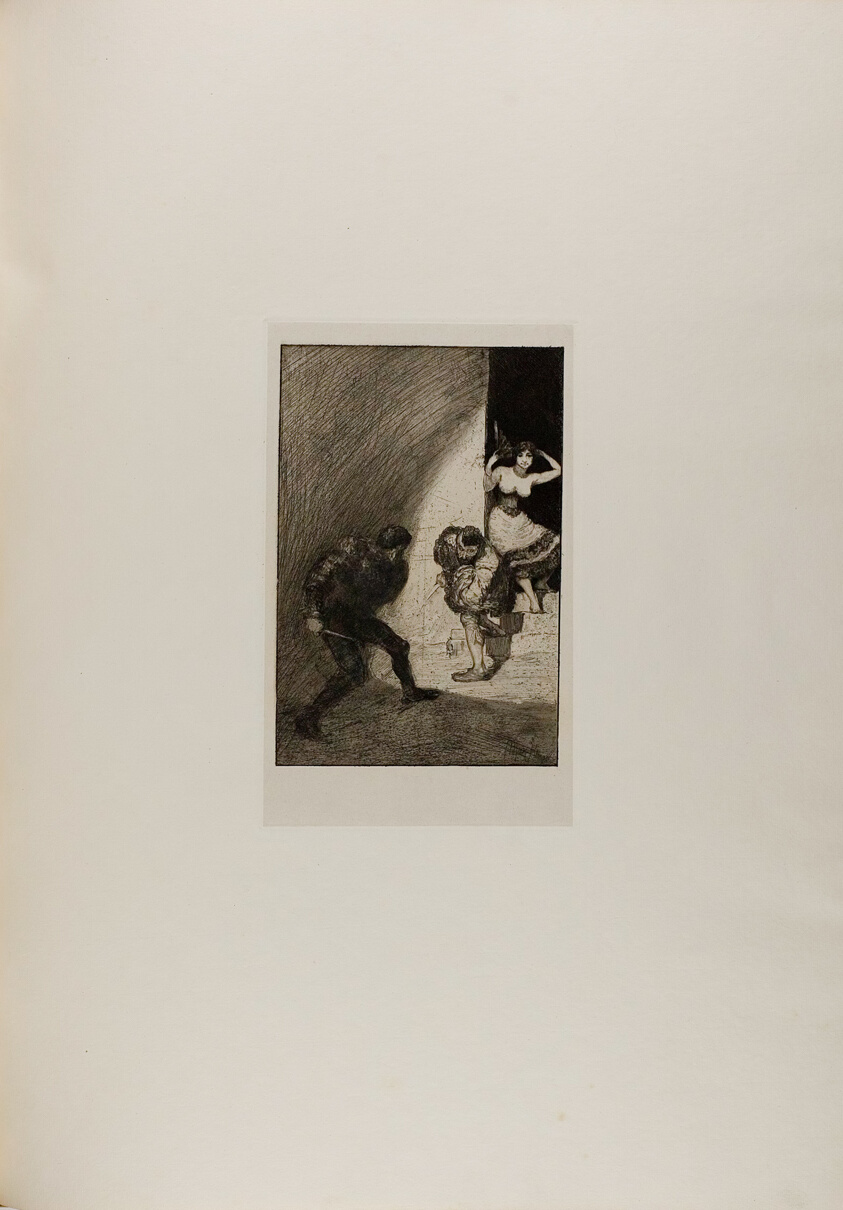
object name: Print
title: Rivals, plate seven from A Life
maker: Max Klinger (German, 1857-1920); printed by Otto Felsing (German, 19th century)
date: 1884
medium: Etching and aquatint, with roulette, stipple and drypoint on ivory China paper, laid down on cream laid paper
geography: Germany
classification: etching; print; prints and drawing